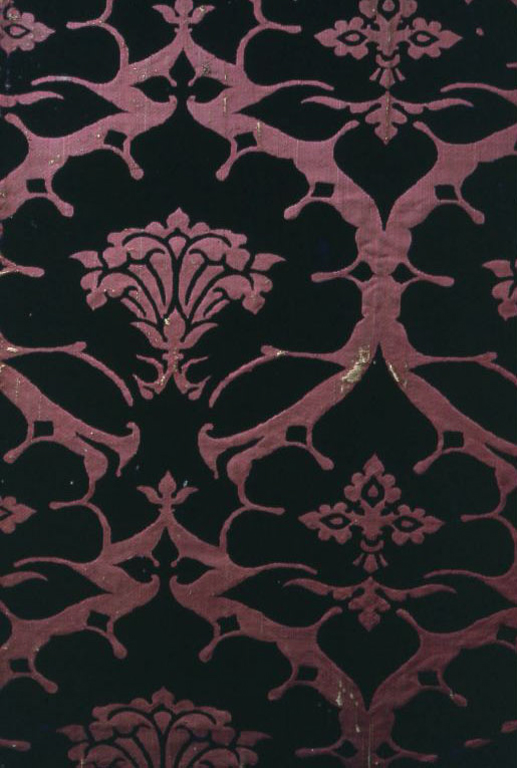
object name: Textile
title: Fragment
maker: Italy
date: 15th century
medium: Silk, cut, and voided velvet against satin weave foundation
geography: Italy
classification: textile; weaving - velvet; weaving